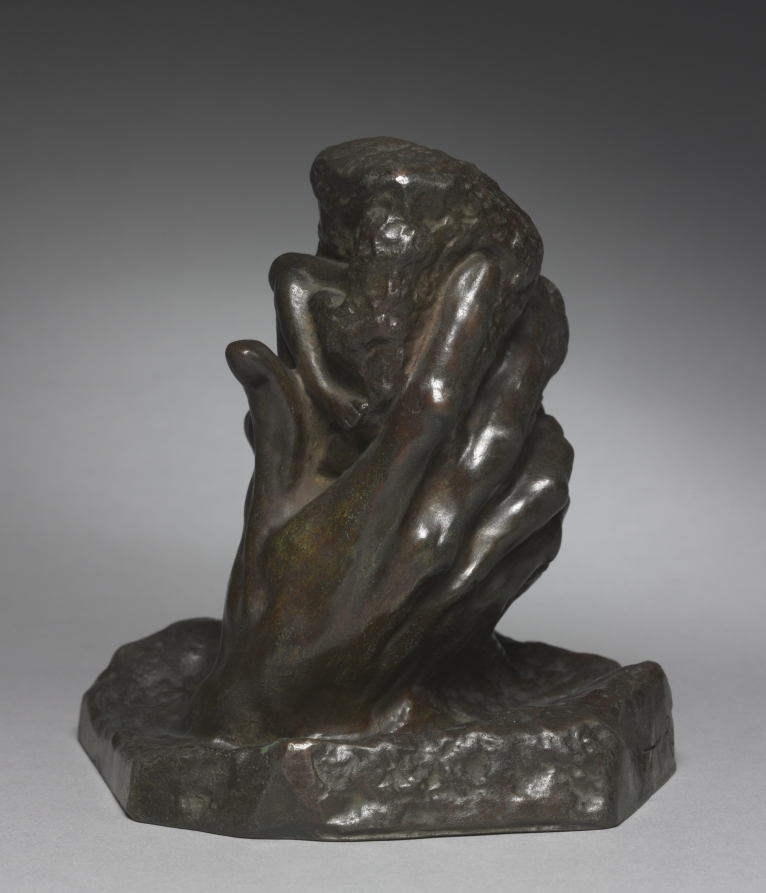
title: The Hand of God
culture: France, late 19th-early 20th Century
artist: Auguste Rodin (French, 1840–1917)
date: c. 1880 – 1917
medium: bronze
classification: Sculpture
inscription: Signed on back and in relief inside the lower base: "A. Rodin"